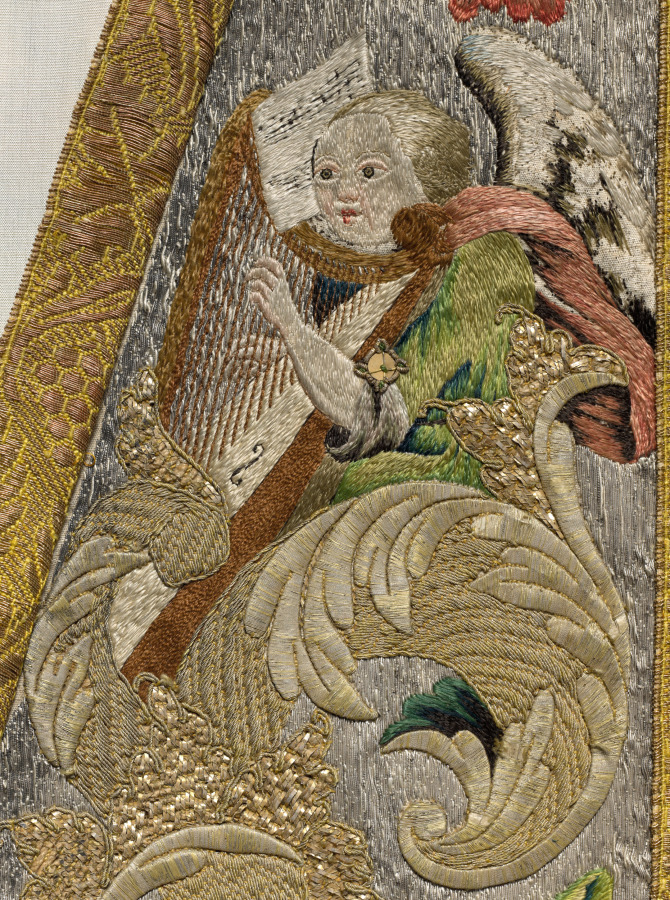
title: Chasuble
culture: Germany, Bavaria, last quarter of 17th century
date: 1675–99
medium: Silk and metallic threads on silk tabby sewn down on a linen tabby ground; embroidery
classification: Embroidery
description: This rare chasuble decorated with angels, musicians, pomegranates, and flowers represents Sacred and Profane Love. This is indicated by two figures—a clear-sighted figure embracing a blindfolded figure—standing on a globe in the upper center and also by the musicians. The angels play soft-sounding instruments (harpsichords, harps, viole da barccio, and flutes) while earthy figures play loud instruments (tambours and hunting horns). The chasuble was most likely part of a liturgical set commissioned for a wedding. This entire chasuble is embroidered with silk and metal thread laid over linen and stitched in place. The exceptionally fine workmanship, lavish use of gold and silver, and brilliant silk thread create this sumptuous vestment.